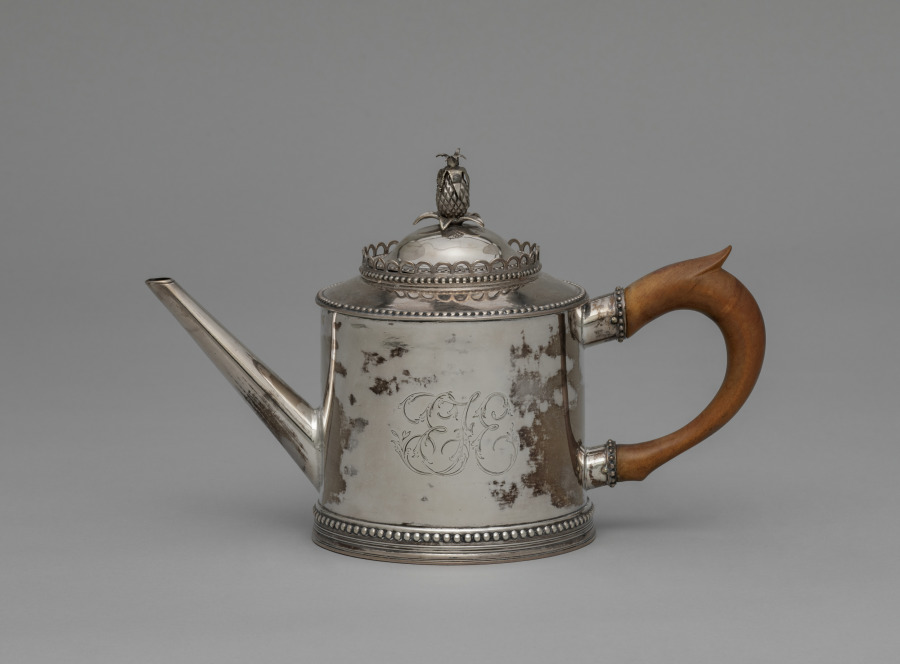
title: Teapot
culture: America, Pennsylvania, Philadelphia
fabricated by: John David (American, 1736–1793)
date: c. 1790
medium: silver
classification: Silver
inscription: engraved: "EFE" in script .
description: This teapot may have belonged to Dr. Enoch F. Edwards, George Washington’s personal physician.